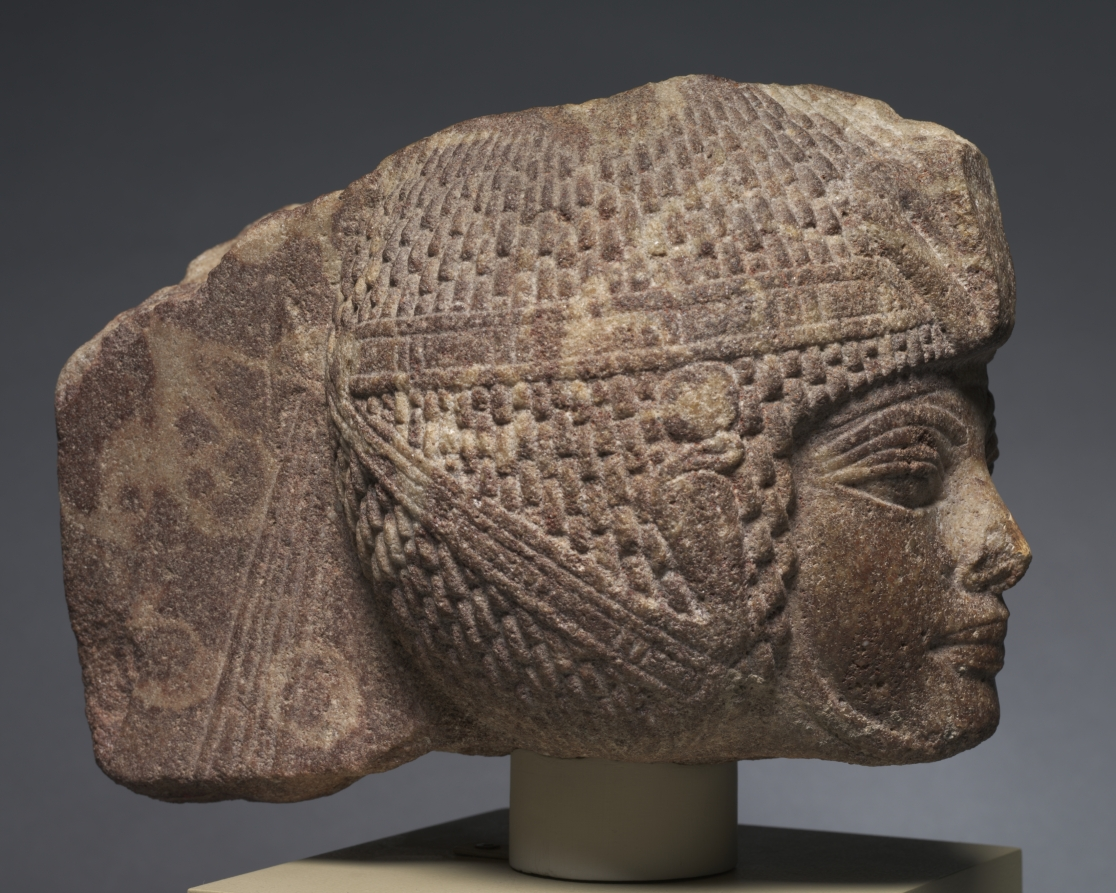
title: Head of Amenhotep III Wearing the Round Wig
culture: Egypt, New Kingdom (1540–1069 BCE), Dynasty 18, reign of Amenhotep III (1390–1352 BCE)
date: c. 1391–1353 BCE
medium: brown quartzite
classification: Sculpture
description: Although he must have been nearly 50 years old when this portrait was carved, Amenhotep III appears more youthful than ever. Over a round, curly wig he wears a diadem with side streamers adorned with cobras bearing sun disks on their heads. The stone quartzite was associated with the sun on account of its ruddy hues, ranging in color from brown to red to purple. It was a favorite of Amenhotep III, the king who called himself the "dazzling sun-disk of all lands."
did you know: Amenhotep wears a chin strap that would have held up a false beard.